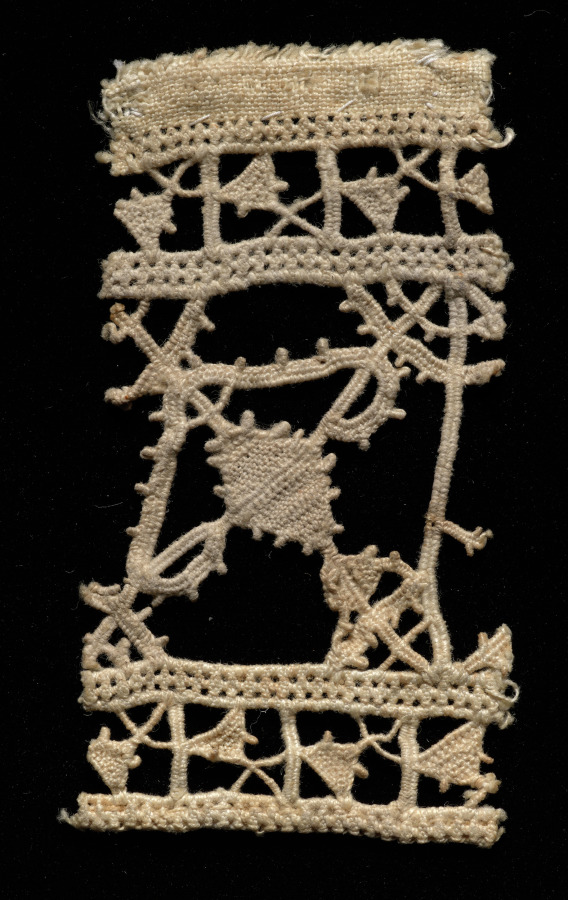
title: Lace Fragment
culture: Italy, 1600s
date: 1600s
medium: Linen: needle lace (Reticella)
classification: Lace